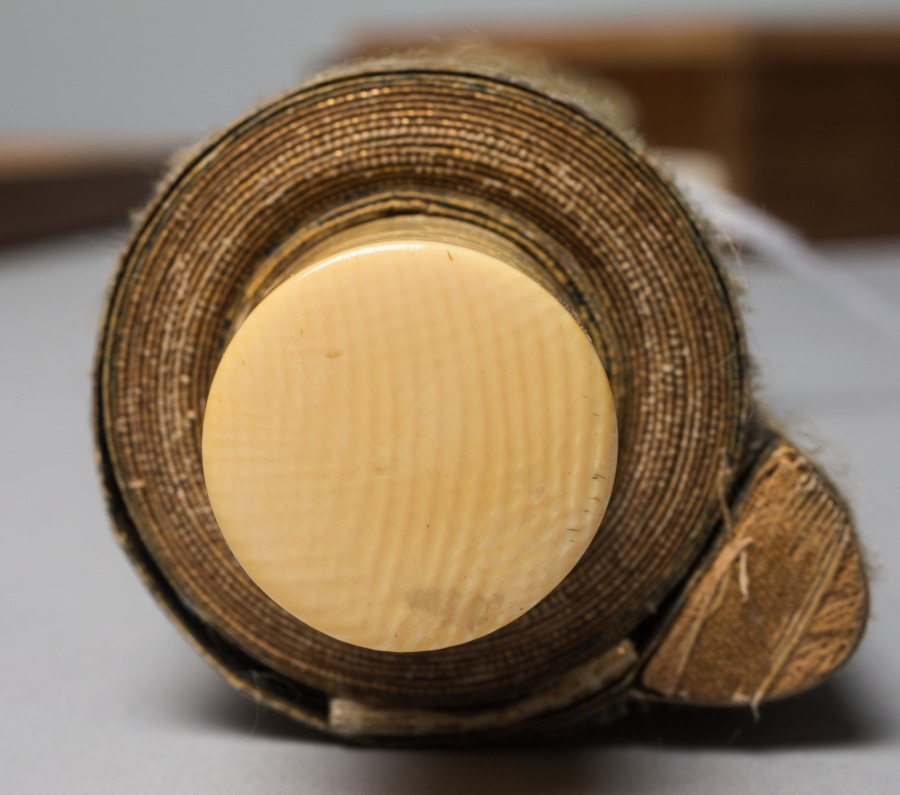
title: Chinese Bird on Snow-Laden Branch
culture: Japan, Edo period (1615–1868)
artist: Kano Tan’yū (Japanese, 1602–1674)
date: 1661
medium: One of a triptych of hanging scrolls; ink and slight color on silk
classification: Painting